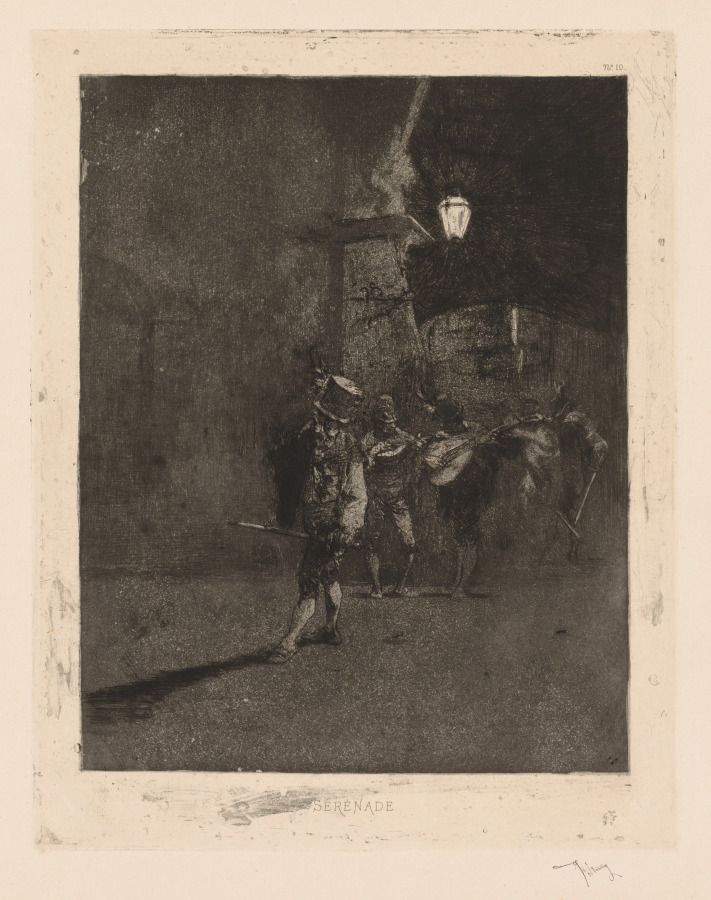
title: Serenade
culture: Spain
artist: Mariano Fortuny (Spanish, 1838–1874)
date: c. 1863–65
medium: etching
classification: Print